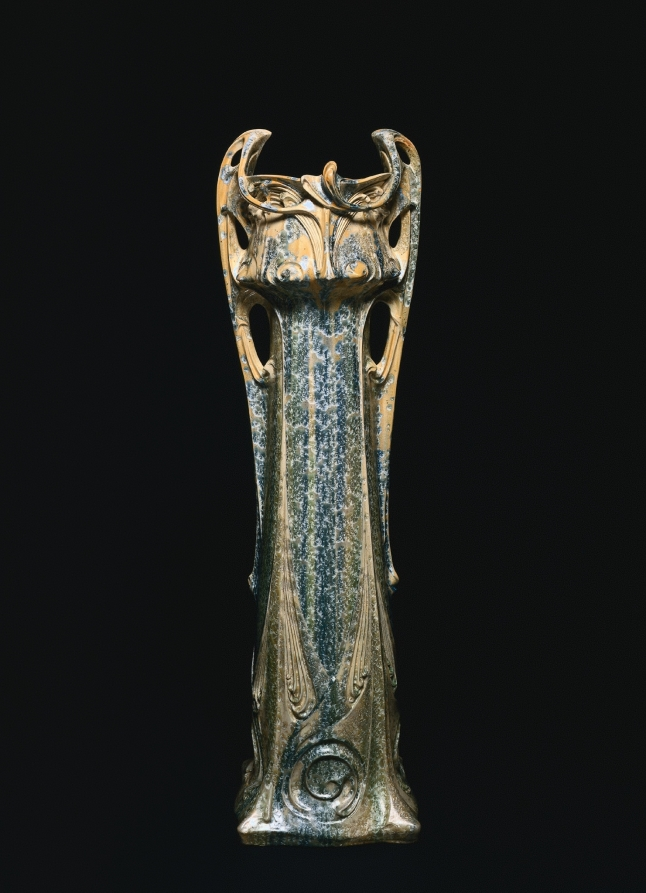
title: Vase des Binelles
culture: France, Sèvres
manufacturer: Sèvres Porcelain Factory (French, est. 1756)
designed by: Hector Guimard (French, 1867–1942)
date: 1903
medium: stoneware with crystalline glaze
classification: Ceramic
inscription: Gres 1903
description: In 1899, French architect Hector Guimard designed the Castle Henriette, built on Rue des Binelles in Sèvres, a suburb of Paris, France. This stoneware vase is named for the street and bears similarities to architectural features of Castle Henriette. The vase’s asymmetrical and curvilinear design showcases the trademarks of the Art Nouveau style. Five examples of the Vase des Binelles were made by the still-operating Sèvres Manufactory, whose ceramics were celebrated for their innovative decoration and design since its establishment in the mid-1700s.